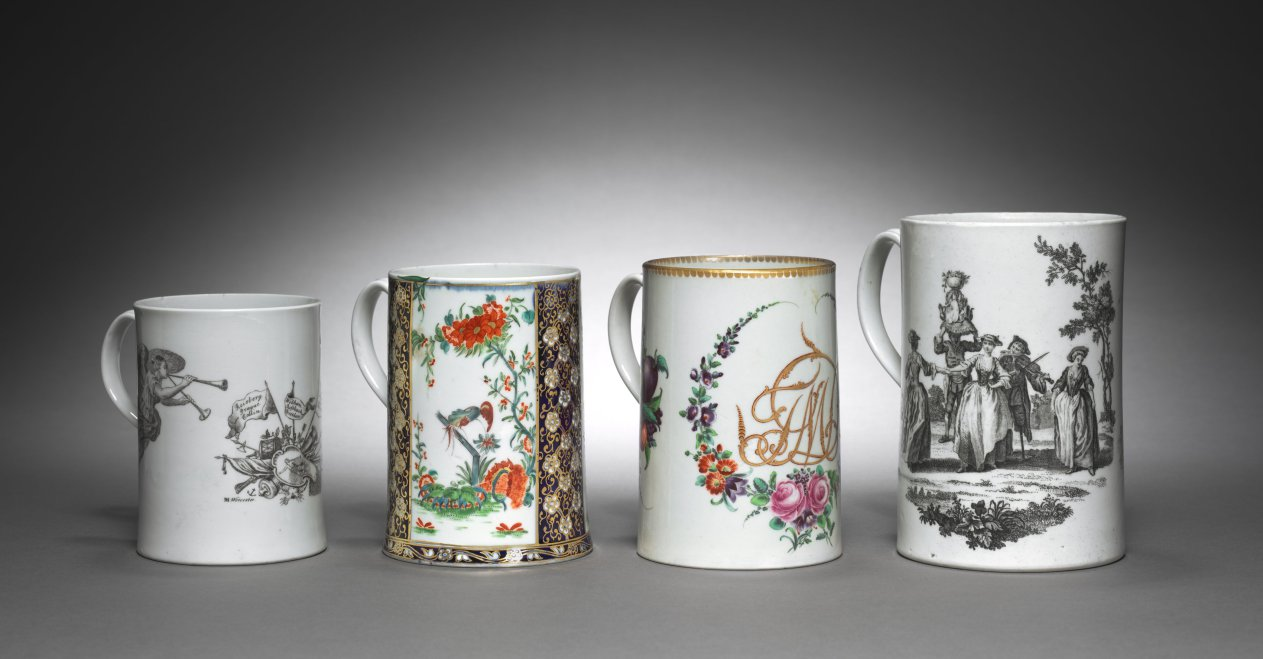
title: Cann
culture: England, 18th century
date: c. 1775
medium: ceramic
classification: Ceramic